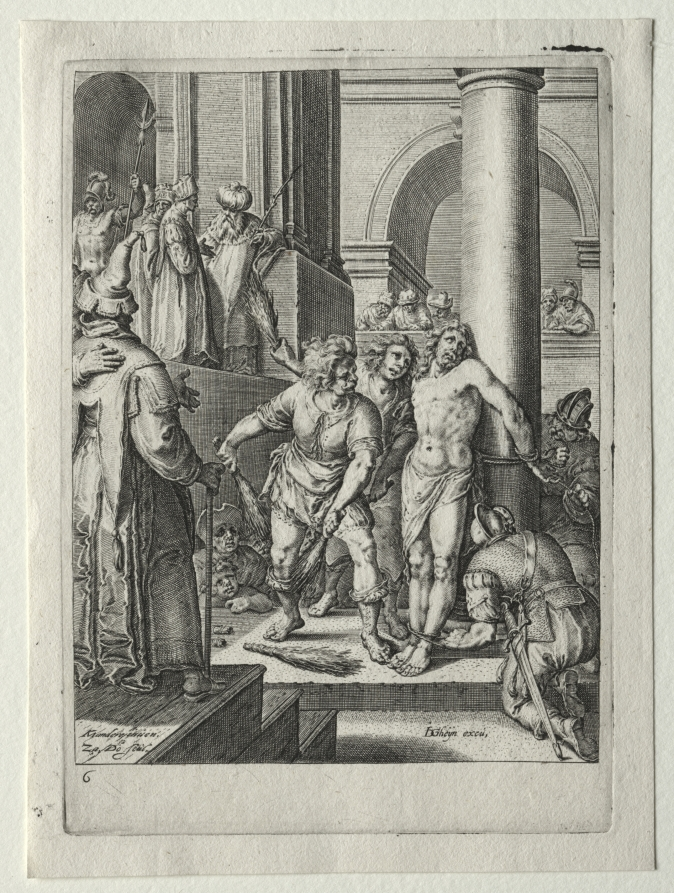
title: Passion Set: Flagellation of Christ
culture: Netherlands, 16th century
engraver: Zacharias Dolendo (Dutch, 1561–1604)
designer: after Karel van Mander I (Dutch, 1548–1606)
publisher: Jacob de Gheyn II (Netherlandish, 1565–1629)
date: 1596–98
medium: engraving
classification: Print